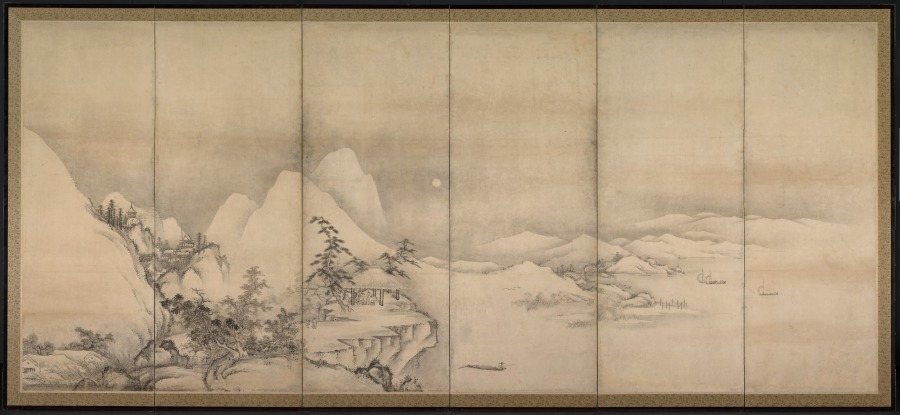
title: Chinese Landscape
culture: Japan, Muromachi period (1392–1573)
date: 1500s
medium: One of a pair of six-fold screens; ink and slight color on paper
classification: Painting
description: In a panorama of mountains and expanses of water, three gentlemen have assembled by moonlight to enjoy one another’s company away from a bustling village. An influx of ink paintings from China in both album and scroll formats beginning in the late 1200s inspired Japanese artists to create landscapes based upon Chinese prototypes. Later, Japanese painters adapted the imagery to the larger format of folding screens, which were used to define spaces in large rooms.